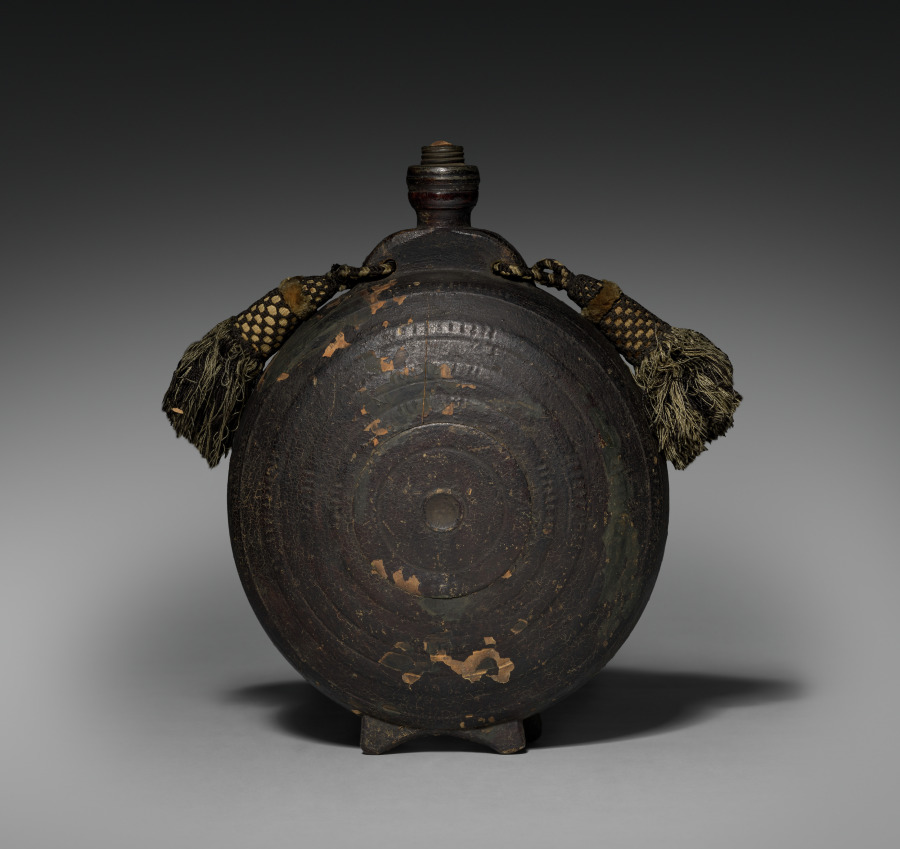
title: Powder Canister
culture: Italy, 18th century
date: 1700s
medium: wood painted black, lead charger, pewter mount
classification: Arms and Armor